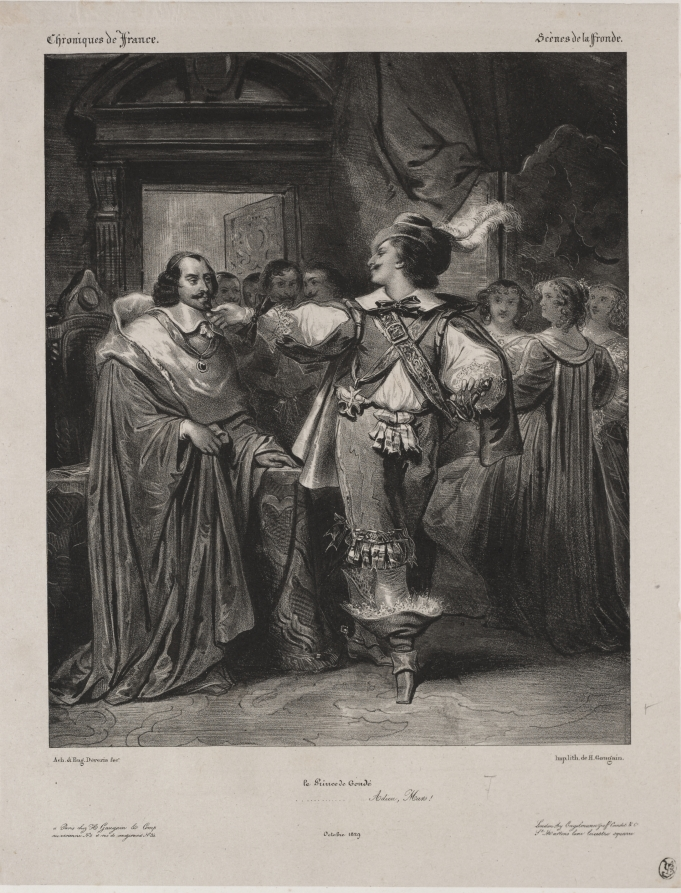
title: Chronicles of France: Scene of the Fronde - The Prince of Condé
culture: France, 19th century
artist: Eugène François Marie Joseph Devéria (French, 1805–1865)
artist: and Achille Devéria (French, 1800–1857)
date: 1829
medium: lithograph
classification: Print